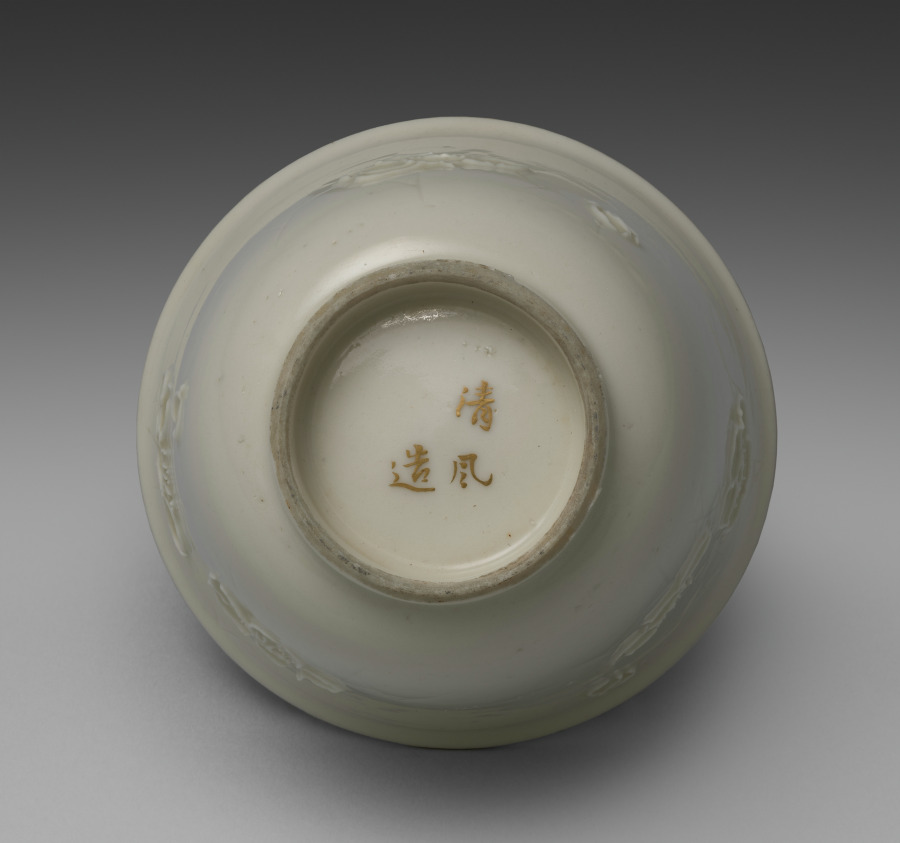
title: Drinking Cup from Dining Set with Plum Blossoms and Cracked-Ice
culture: Japan, Meiji period (1868–1912)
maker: Seifū Yohei II (Japanese, 1844–1878)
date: c. 1875–78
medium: Porcelain with molded designs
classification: Ceramic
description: Each item in this set has a delicate low-relief design of flowering plum branches over scattered, intersecting lines meant to resemble the cracked-ice surface of a frozen body of water and is signed on the base in gold pigment. While Yohei II produced many fine works in underglaze blue, like those produced by Kiyomizu Shichibei, he also made works in quite different styles later in his career, from the early 1870 s. In 1873, he was appointed purveyor to the Industrial Center of Kyoto Prefecture, a designation associated with Kyoto’s efforts to reach an international market through the port of Kobe; and from 1875 until his death, he was involved in national-level projects to present Japanese ceramics across the world. It was during this period that Yohei III was apprenticed to Yohei II, and it has been suggested that this set may in fact be an early example of Yohei III’s work, which he signed with his teacher’s name. Decorated with flowers resembling Japanese textile motifs, the set calls to mind the design of Yohei II’s pair of vases with plum blossoms in the Victoria and Albert Museum. Here, the elaborate trees created for a formal public exhibition setting have been translated into the approachable blossoms of the genteel domestic environment. While the designs are consistent across the pieces, each raised flower petal and pistil and each incised line in the ice was done by hand, so the cups, bowls, and dishes are similar yet unique. The bottoms of two boxes once identified the set’s owner, but the information has been deliberately obscured with black ink. However, inscriptions still visible appear to indicate two occasions, once at the end of July 1886 , and once again in June 1916 , when parts of the set were requested from Hokura in Niigata Prefecture. The location corresponds to a neighborhood in the present-day city of Jōetsu. The surname Tsuji 辻 also appears on a paper tag affixed to one of the box cloths. Future research may possibly reveal more about their provenance. A vase by Yohei III in a private collection combines the formal grandeur of the Yohei II vases in the Victoria and Albert Museum with the gentler design of this dining set, placing flowering plum trees against soft, scalloped-edge clouds resembling those in golden screens.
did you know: The dining wares have a creamy white coloration that the four boxes containing them identify as Korean in style.